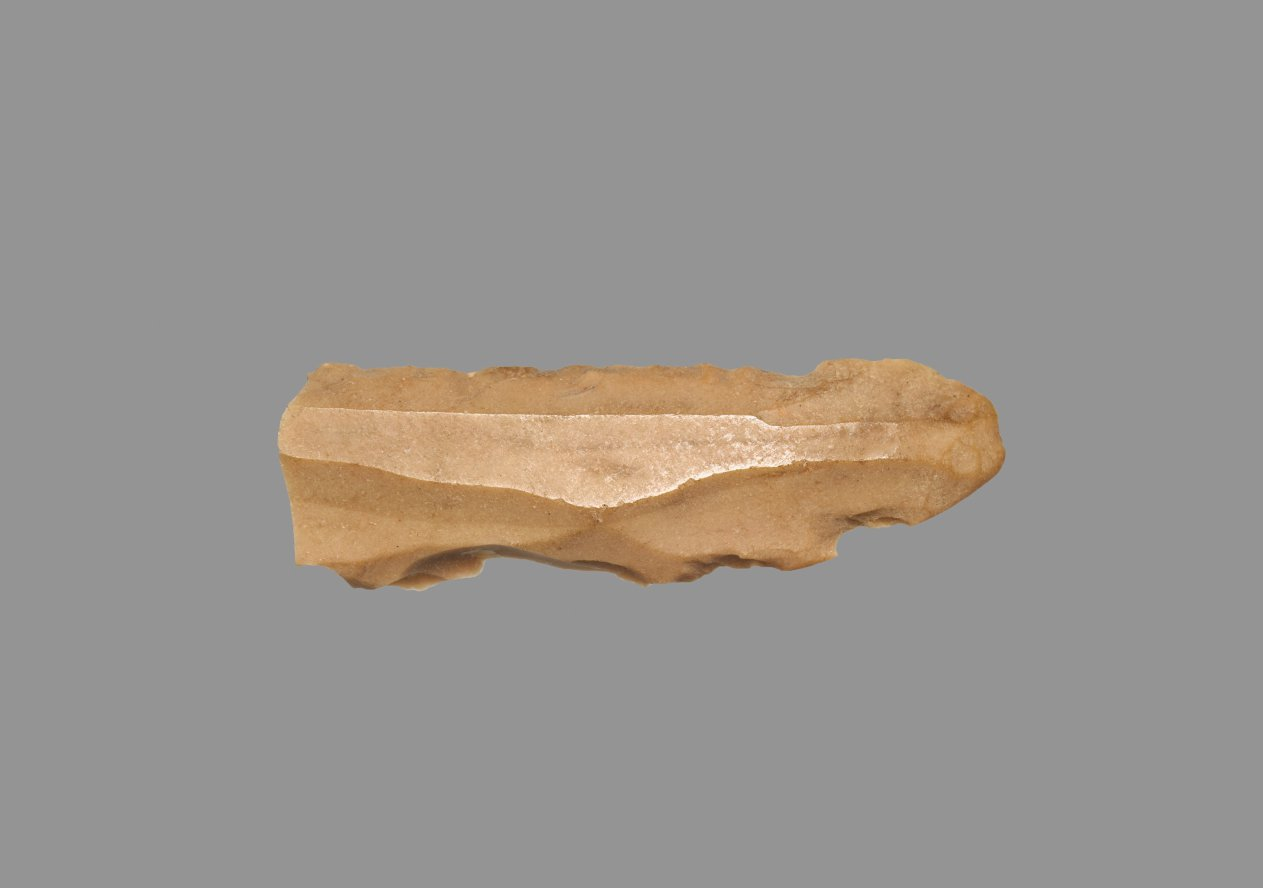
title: Sickle Blade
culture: Egypt, Middle Kingdom (2040–1648 BCE), Dynasty 12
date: 1980–1801 BCE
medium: flint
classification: Implements